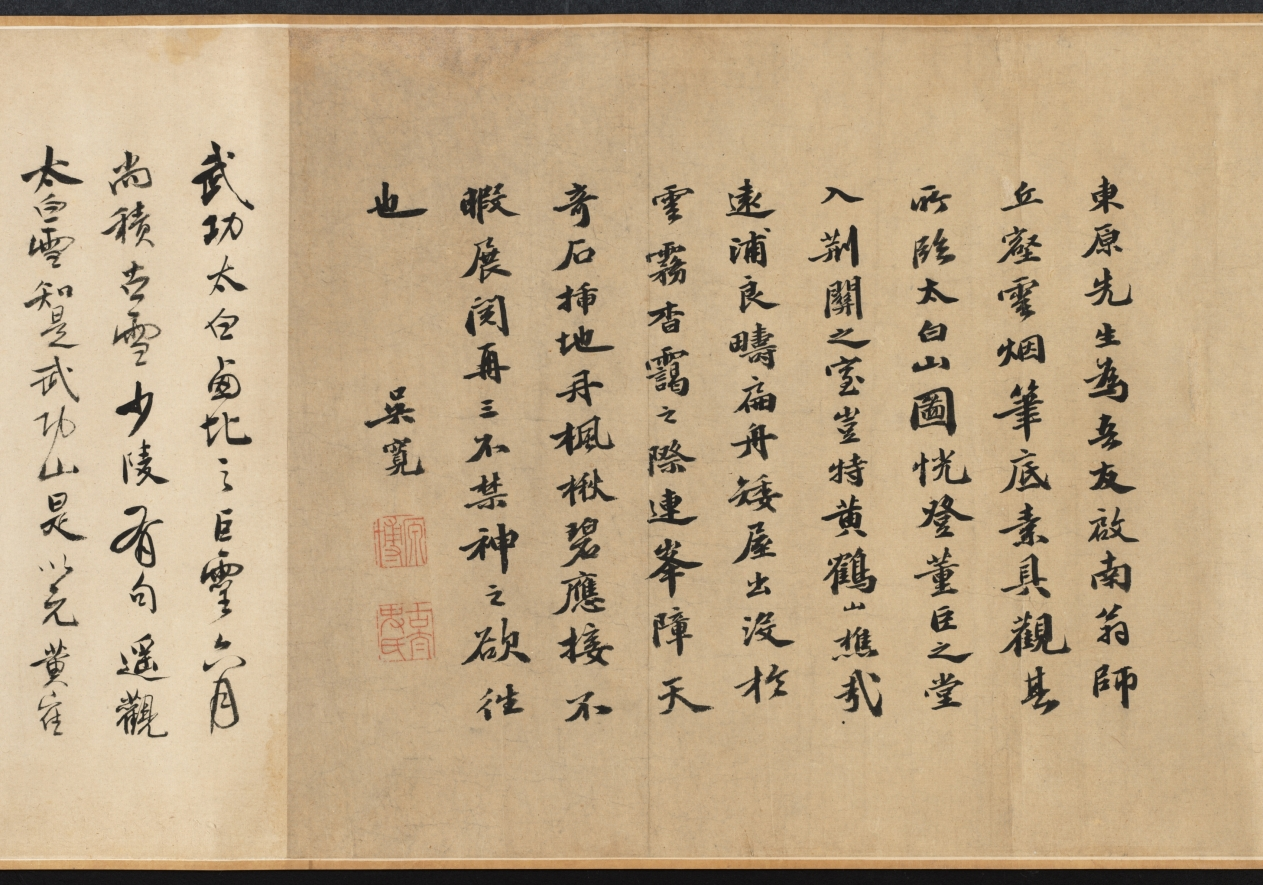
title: Mt. Taibo in the Style of Wang Meng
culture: China, Ming dynasty (1368–1644)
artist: Du Qiong (Chinese, 1396–1474)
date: 1442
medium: handscroll; ink and light color on paper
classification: Painting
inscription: Artist's inscription, signature, and 11 seals: [1 seal] Tung-yüan chai. Huang-ho-shan-ch'iao [Wang Meng] painted a painted called T'ai-po Mountain. Its brushwork is superior and admirable, which is very close to Yu-ch'en [Wang Wei, 699-759]. The cleverness of its composition, the maple groves and rustic temples, the inaccessible ravines and autumnal plateaus, the periolous peaks and strange rocks, etc., all seem to be so natural. The paper is only a little over eight feet, but the landscape has the range of a thousand miles. Once you open and note the contents, it is as if one were roaming among the mountain peaks enveloped in mist and clouds, and forgot the dusty world. When I first saw this, I was so mixed with excitement and joy that I could not take my hands off the painting. So I put it on the table, and tried my best to imitate it, forgetting sleeping and eating for about three months before it was completed. Although I do not dare to tread in the footsteps of Huang-ho shan ch'iao, I took great pains to capture his spirit in composition and colors. I do not know whether it would pass the judgment of the experts. On the fifteenth day of the fifth month, the seventh year of the Cheng-t'ung year [1442], inscribed by Tung-yüan, Tu Chiung. [2 seals] Yung-chia; Ching-chieh ming-men. [8 seals on painting] Tung-yüan chai; Ching-chieh ming-men; Yung-chia; Tu Ch'iung yin; Tung-yüan (repeated 5 times). trans. WKH/LYSL 3 colophons and 7 additional seals: 1 colophon and 2 seals of Chou Ting (1401-1487); 1 colophon and 2 seals of Wu K'uan (1435-1504); 1 colophon, dated 1655, and 2 seals of Lan Ying (1585-after 1664).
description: When a Chinese painter "imitated" a painting by a past master, the intention was never to produce an exact copy. Du Qiong, the Ming painter from Suzhou, is a case in point. The painting style of this handscroll is actually closer to that of Huang Gongwang (1269–1354) than to the style of Wang Meng (about 1301–1385). Both masters were active during the previous dynasty and are among the so-called Four Great Masters of the Yuan dynasty (1279–1368). In this painting, the interplay of styles, including Du Qiong's own, contribute to an inner dimension that is more than visual. Mt. Taibo is located in the province of Zhejiang and is known for its scenic beauty. In this scroll, however, it is not depicted literally. The image is an ideal representation of mountains in southeastern China.